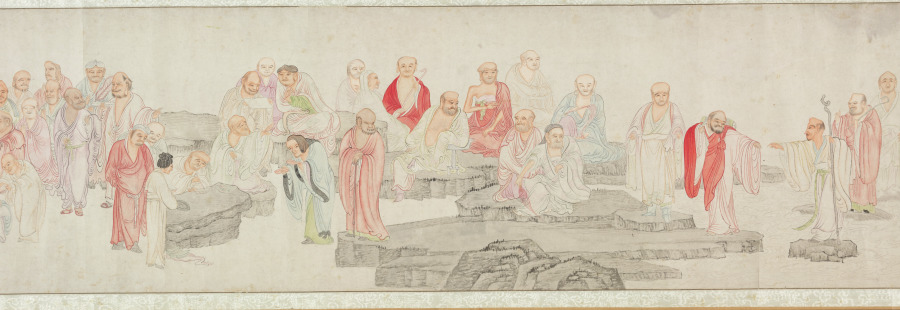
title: The Five Hundred Arhats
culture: China, Ming dynasty (1368–1644)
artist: Wu Bin (Chinese, active c. 1591–1626)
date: 1591–1626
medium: Handscroll; ink and color on paper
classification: Painting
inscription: 枝隱頭陀吳彬齋心拜寫 [印]吳彬之印; 文中父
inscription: 7 seals of Qianlong emperor (r. 1736–95): Gu xi tian zi 古希天子; Shou 壽; Qianlong jian shang 乾隆鑑賞; San xi tang jing jian xi 三希堂精鑑璽; Yi zi sun 宜子孫; Tai shang huang di zhi bao 太上皇帝之寳; Qian qing gong bao 乾清宮寶.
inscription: 6 seals of Cheng Qi 程琦 (1911–1988): Ke an geng zi wu shi yi hou suo de ming ji 可菴庚子五十以後所得名跡; 5 other Cheng Qi seals.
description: More than 66 feet long, this handscroll depicts 447 luohans, 72 attendants, and the bodhisattva of compassion at its very end. Luohans (arhats in Sanskrit), disciples of the Buddha and protectors of the Buddha’s law, possess supernatural powers and take on myriad external appearances. The amusing assortment of characters are engaged in an array of religious, secular, and miraculous activities. The painter used stylistic features borrowed from earlier artists, carefully controlled lines, and refined coloring. Wu Bin was a lay Buddhist and depicting this sort of image was part of a religious practice seeking understanding of the Buddha’s teaching.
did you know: Far advanced on the path to enlightenment, arhats have the capacity to tame tigers, free dragons, and to float on water or in the air.